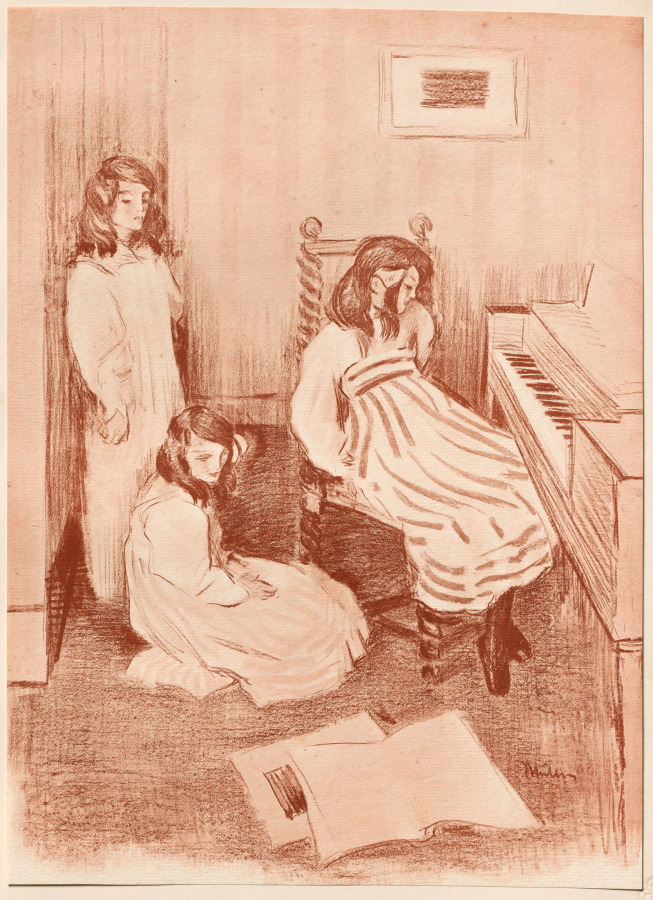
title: Bouderie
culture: France, Paris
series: L'Estampe Moderne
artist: Alfredo Müller (Italian, 1869–1940)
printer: Imprimerie Champenois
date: 1898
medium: Color lithograph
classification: Bound Volume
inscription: In plate: lower right of image: Muller; lower right corner of sheet: blindstamp of l'Estampe Moderne (Lugt 2790)